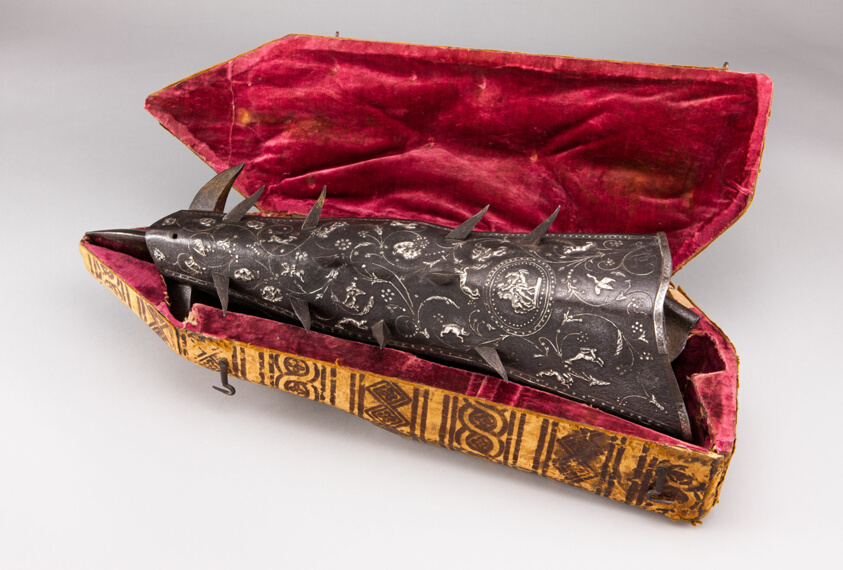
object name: Armor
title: Clawed Arm Defense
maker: Attributed to Antonio Cortelazzo; Italian, active mid-19th century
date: mid–19th century in the early 17th centlury style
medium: Steel, silver, velvet weave, and wood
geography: Italy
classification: suit-gauntlet; armor; arms and armor